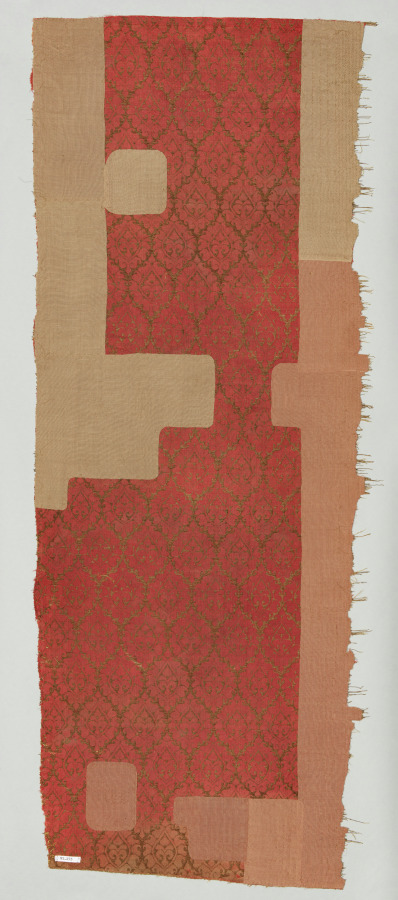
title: Textile with Palmettes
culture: Central Asia, Il-khanid (Mongol) period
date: 1200s–1300s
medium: Silk and gold thread; tabby with supplementary weft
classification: Textile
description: Designs of repeated ogives were popular in Central Asia and survive in a number of variations. Usually, the ogival frame encloses a floral motif, as in this example. Sometimes paired animals occur instead. Silks with this type of pattern were exported to Western Asia and to Europe, where they inspired textile designs woven locally. Mongol silks with exotic floral and animal patterns were acquired for use as clothing and furnishings by the clergy and nobility. They were also used by painters as models for hangings or garments.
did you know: Some of the original coral-red background can be seen along the edges, where it hasn't faded to off-white.